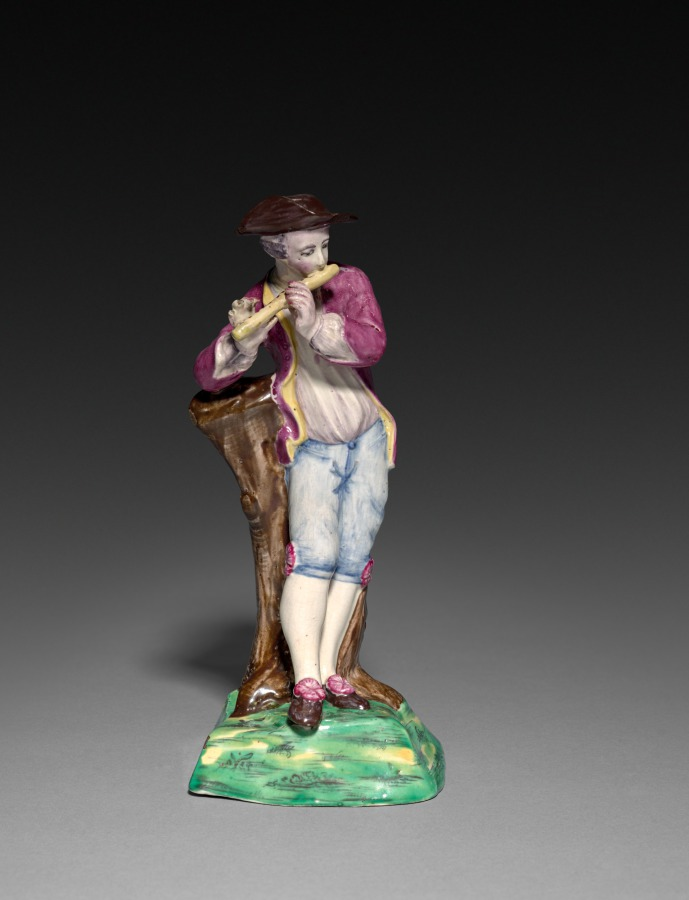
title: Boy Playing a Flute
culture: France, 18th century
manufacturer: Saint-Amand-les-Eaux (French)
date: 1760–1770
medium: faience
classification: Ceramic